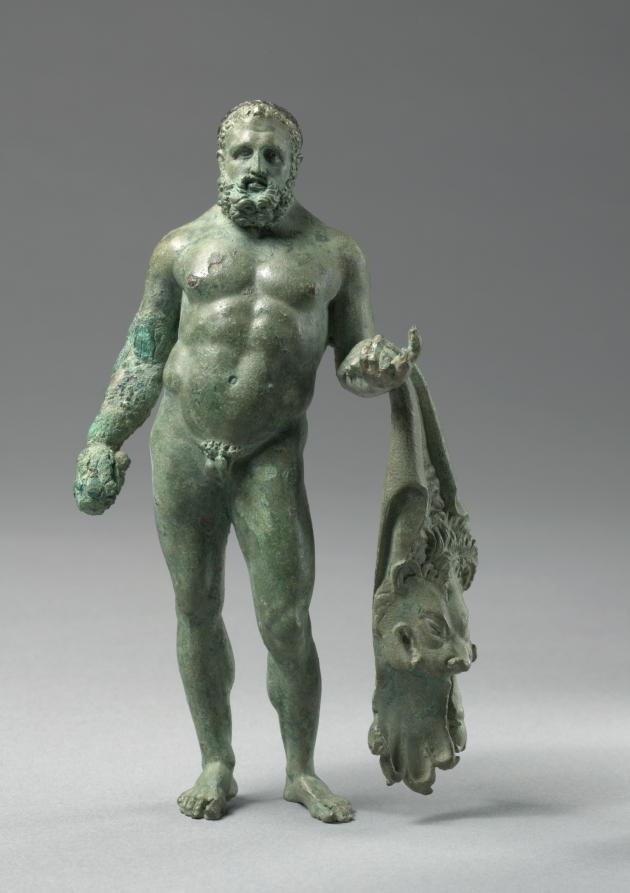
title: Hercules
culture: Italy, Rome, Early Imperial period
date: c. 30 BCE–20 CE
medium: bronze with silver and copper inlays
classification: Sculpture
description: This bronze statuette is a nude figure of the hero Hercules. He stands in a contrapposto pose, with the majority of his weight on one leg. Over his left arm, Hercules holds the skin of the Nemean Lion, having slayed the beast as part of his Twelve Labors and now carrying the pelt as a trophy. Although now mostly lost, Hercules once held his signature wooden club in his right hand. Roman artists often portrayed Hercules as middle-aged, as though greater maturity would increase his power and virility.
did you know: Hercules is the Roman name for the classical hero known in Greek as Herakles.